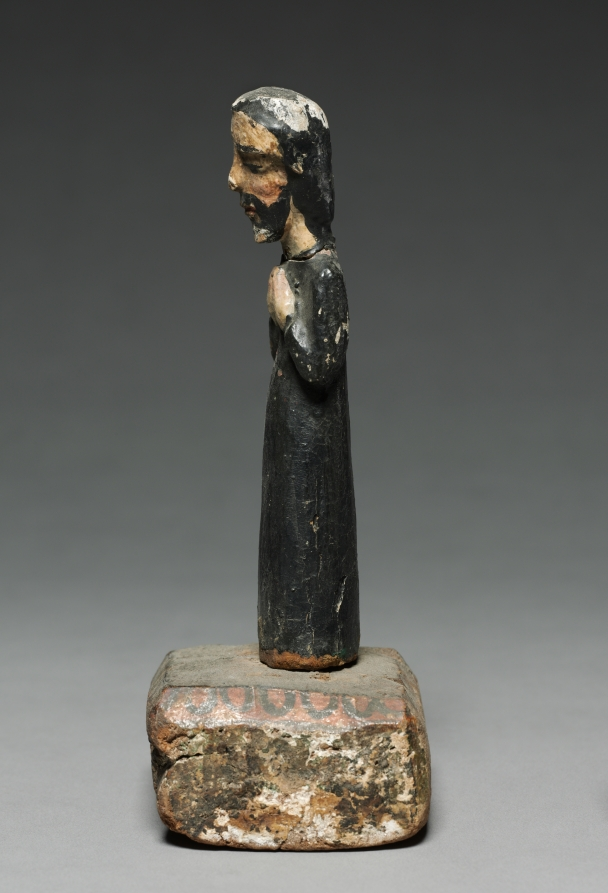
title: San Antonio: santo de bulto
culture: America, New Mexico, 17th-18th century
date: 17th-18th Century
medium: painted wood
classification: Sculpture